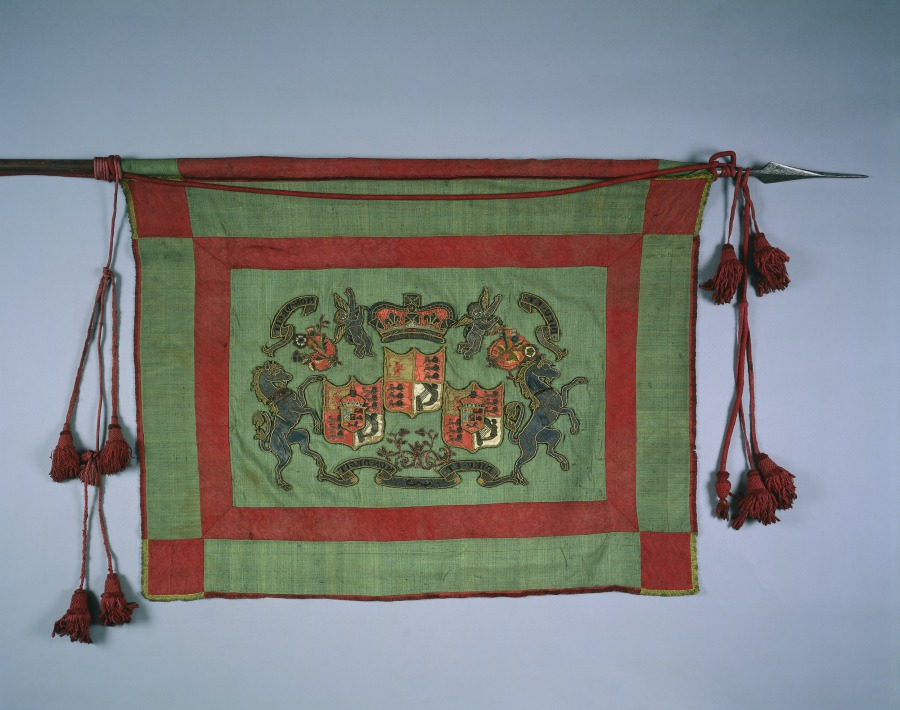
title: Banner with Royal Coat of Arms of Great Britain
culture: Great Britain, probably England, 18th century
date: 1700s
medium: green silk ground with embroidery; crimson cords and tassels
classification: Textile